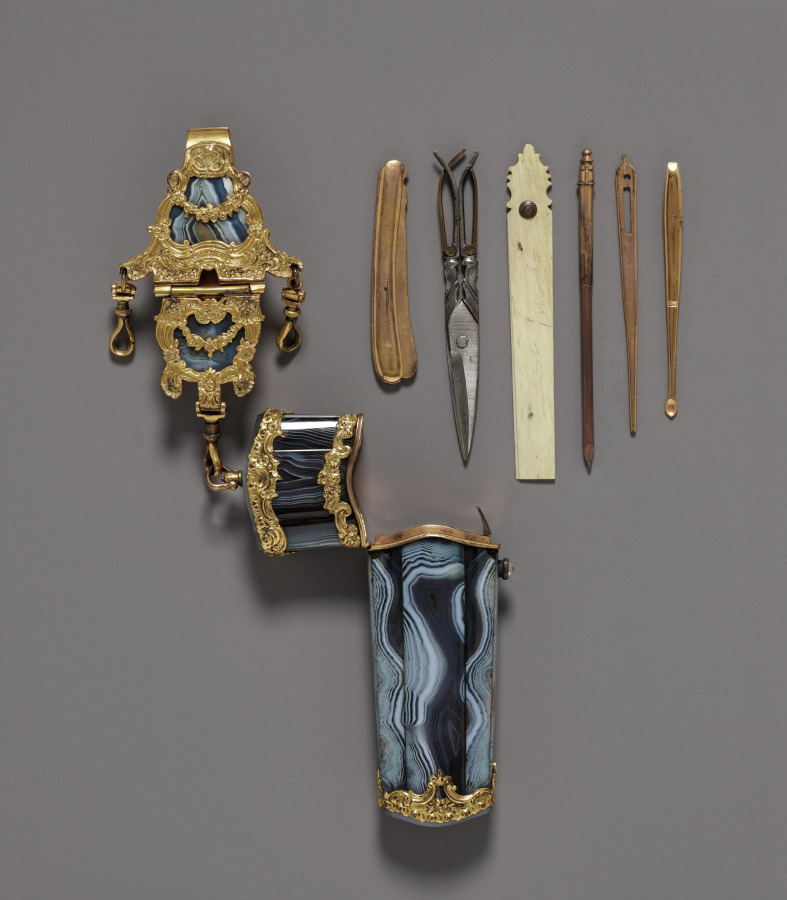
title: Chatelaine and Case (Étui)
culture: England, 18th century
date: c. 1770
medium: gray agate mounted in gilt metal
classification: Miscellaneous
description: Luxurious personal objects were an essential part of a privileged wardrobe during the 1700s and early 1800s, emphasizing their owner’s refinement and wealth. Especially popular were étuis, small ornamented cases containing miniature sewing, writing, or grooming implements that hung at a woman’s waist from an ornate clasp, known as a chatelaine. Despite its glittering surface, this small expensive set disguised a system based on the labor and suffering of enslaved or indentured people, whether in gold and stone mines or the shop where it was made.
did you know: Stored inside this case are grooming and writing instruments such as a clasp knife, scissors, an ivory tablet, a pencil, a threading needle used for lacing corsets, and an ear scoop.